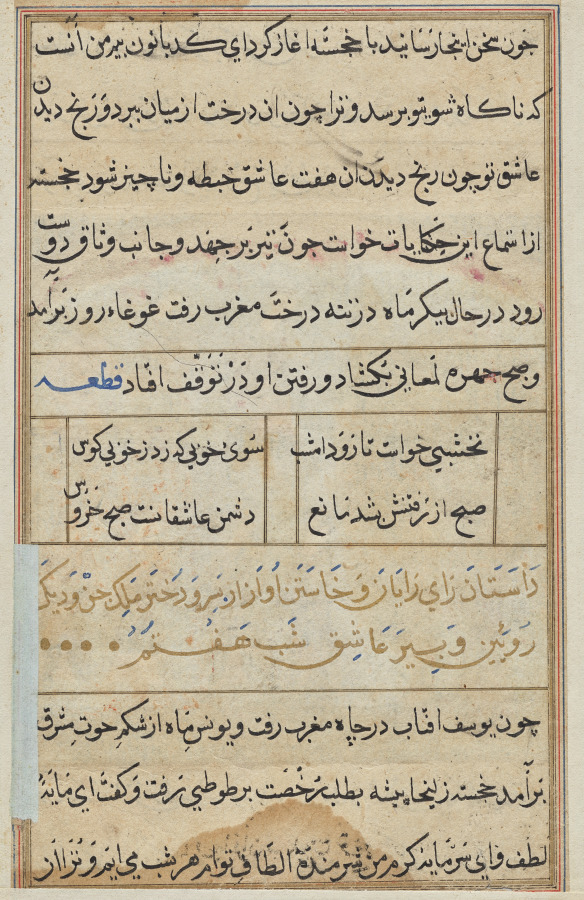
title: Page from Tales of a Parrot (Tuti-nama): text page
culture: Mughal India, court of Akbar (reigned 1556–1605)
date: c. 1560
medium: gum tempera, ink, and gold on paper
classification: Painting